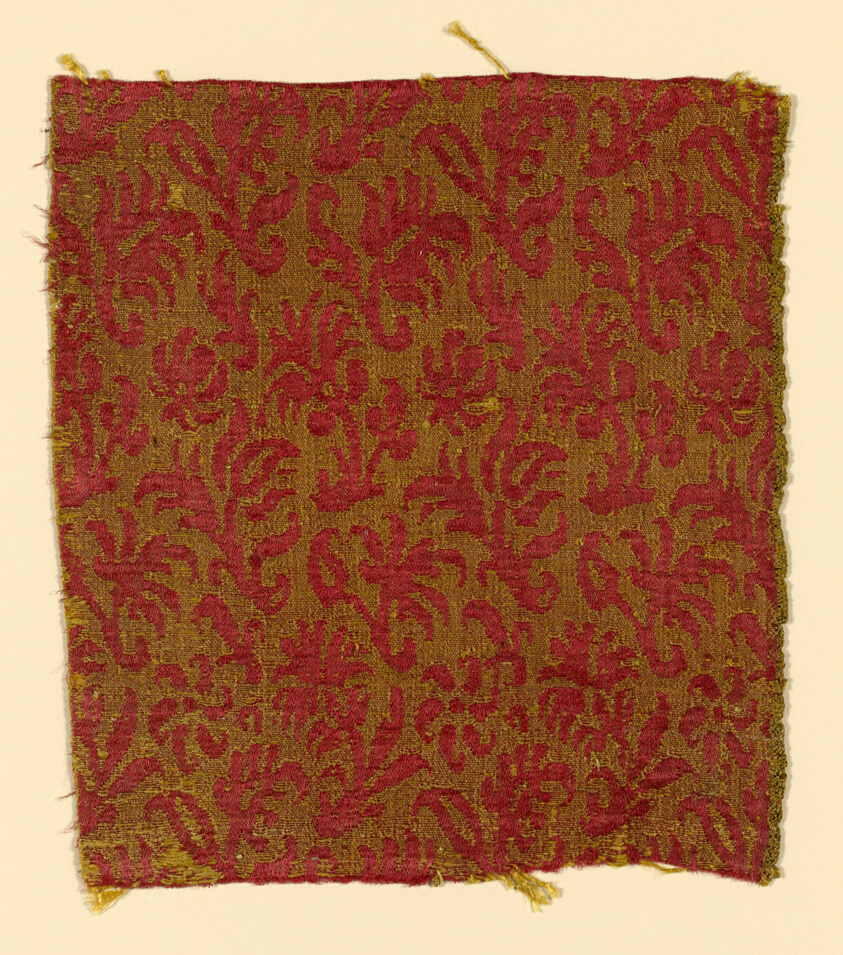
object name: Textile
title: Fragment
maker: Italy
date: c. 1600/50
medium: Silk, simple satin damask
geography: Italy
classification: textile; weaving